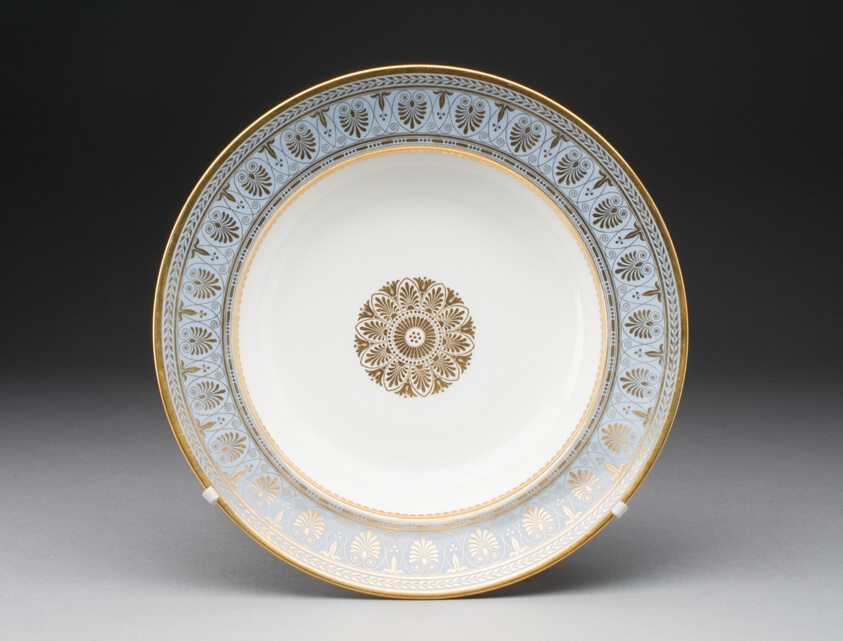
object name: Ceramics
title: Plate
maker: Sèvres Porcelain Manufactory; French, founded 1740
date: 1839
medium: Hard-paste porcelain with light blue border and gilded decoration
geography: Sèvres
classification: plate (general, dish); tableware; dish (vessel); porcelain; european decorative arts; ceramics